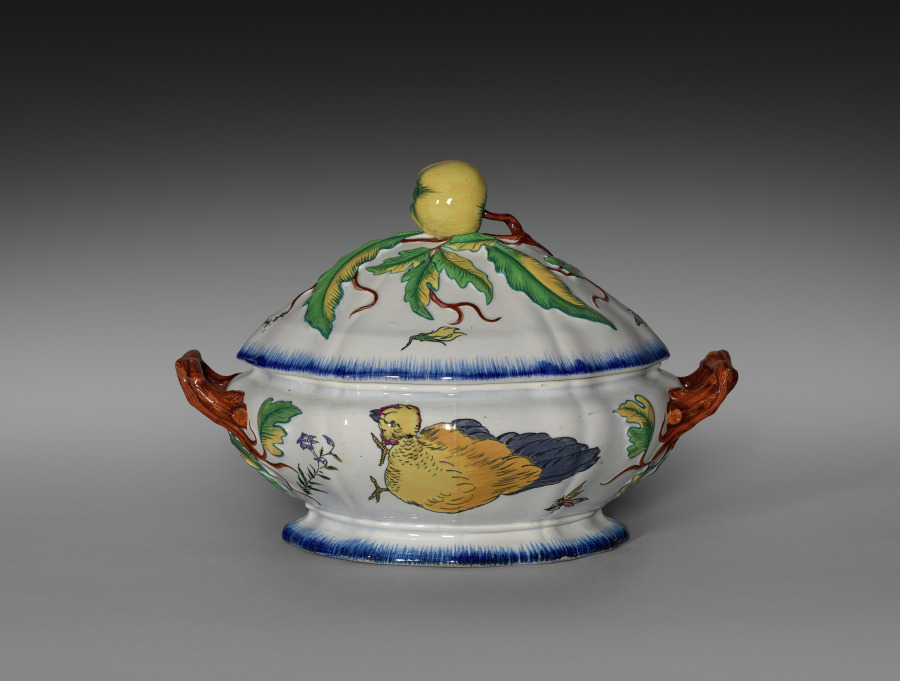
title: Covered Tureen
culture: France, Creil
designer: Félix Bracquemond (French, 1833–1914)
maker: Creil Factory (French)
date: 1866–75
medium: porcelain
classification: Ceramic